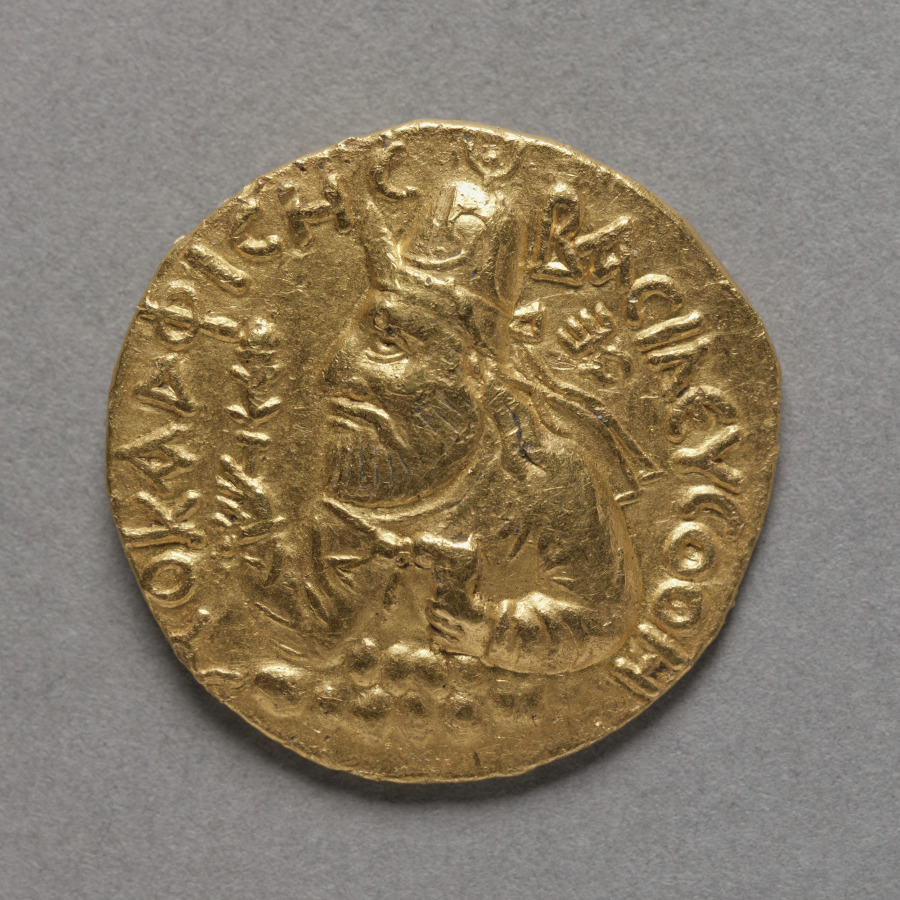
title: Vima Kadphises (obverse)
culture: India, Mathura, Kushan period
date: 50–78 CE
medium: gold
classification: Coins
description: This gold coin represents the reigns of the Kushana ruler, Vima Kadphises. The coin bears a portrait of the ruler on the obverse and various deities on the reverse. It is identified by an inscription in Kharosthi, the language used in northwestern India during the Kushan period.